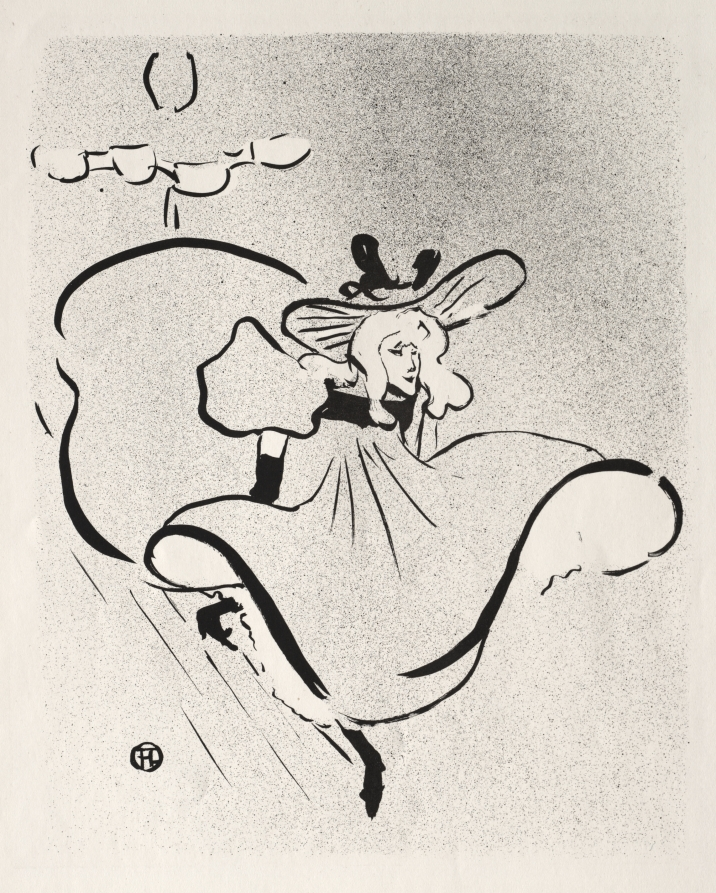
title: Jane Avril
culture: France, 19th century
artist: Henri de Toulouse-Lautrec (French, 1864–1901)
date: 1893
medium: lithograph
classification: Print